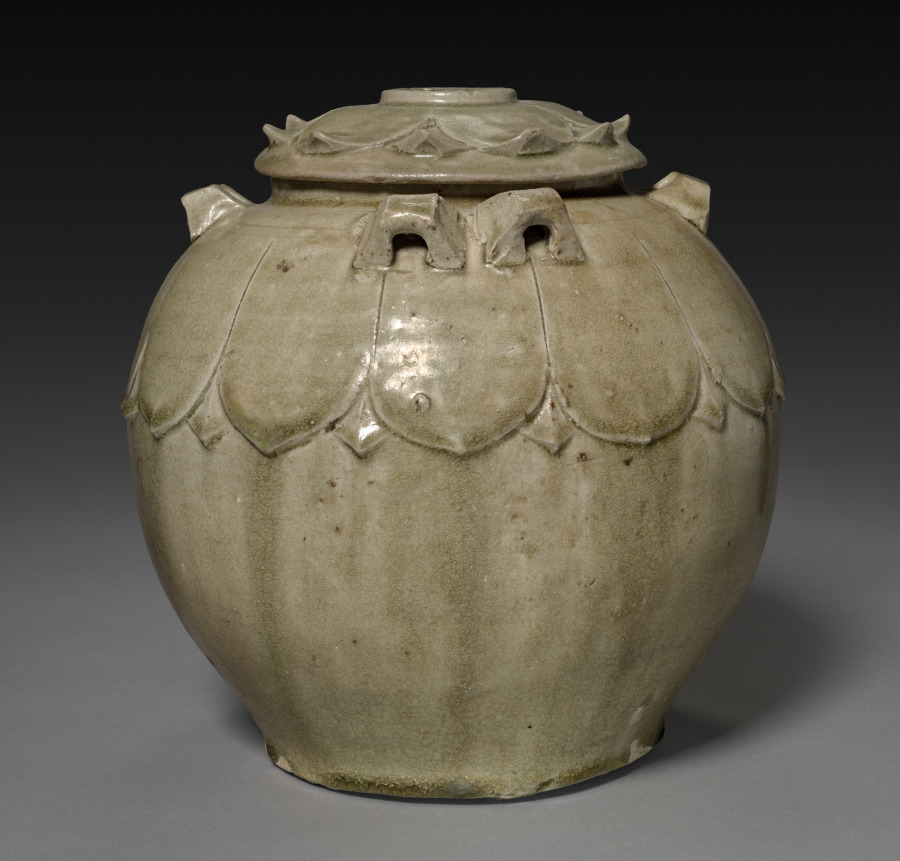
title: Covered Jar with Carved Lotus Petals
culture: China, Northern Dynasties period (386-581)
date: 386–581 CE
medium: Glazed stoneware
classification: Ceramic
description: This jar still has its original cover, which is rare among surviving examples. Its missing knob most likely had the shape of a lotus bud. Beautifully carved lotus petals cover the vessel’s shoulder and lid under a translucent green glaze. In Buddhism, the lotus is a flower symbolizing purity and detachment from worldly affairs; its presence suggests that this vessel was meant to be used in a religious context. The well-crafted double loop handles may have held a silk cloth or other textile that would have been folded over the lid to keep it in place. This aesthetic prefigures the celebrated green celadons in adjacent regions.